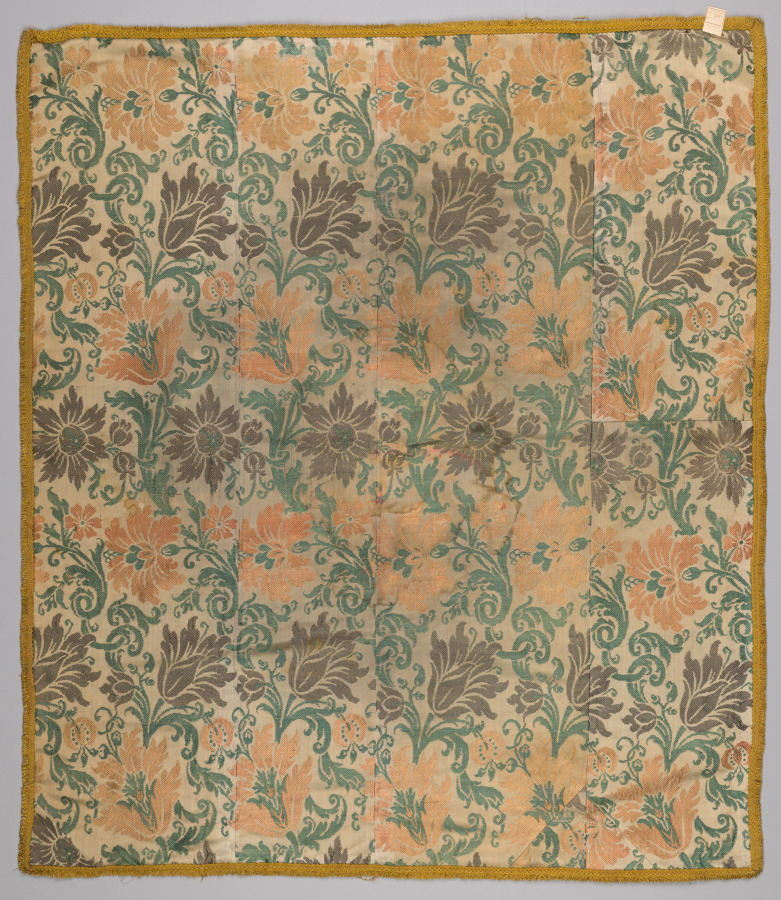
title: Silk Textile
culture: Italy, 17th century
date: 17th century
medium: silk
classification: Textile